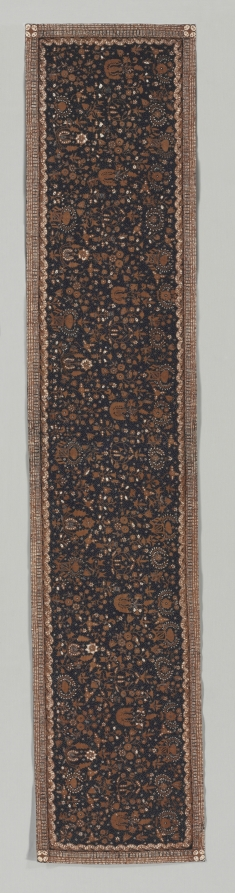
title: Slendang (Shoulder Cloth or Wearing Cloth)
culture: Indonesia, Central Java, 19th century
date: 1800s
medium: batik; cotton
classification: Textile